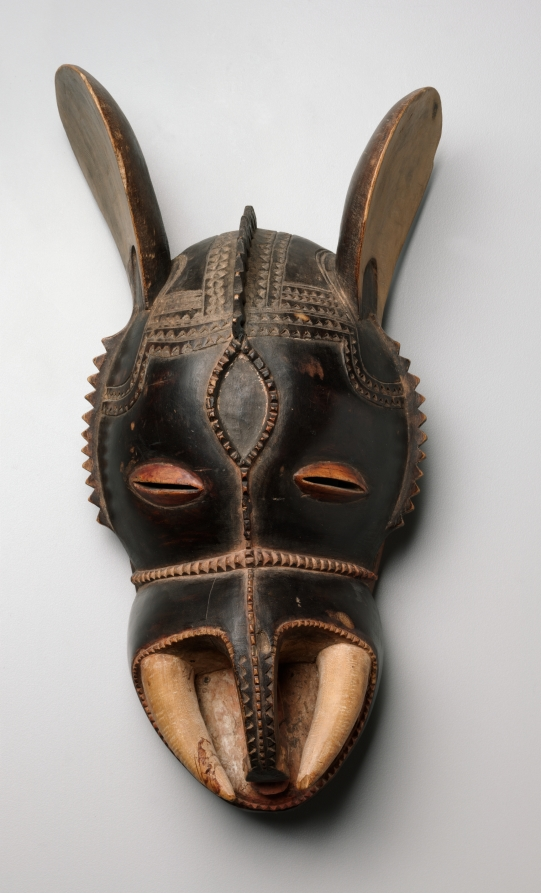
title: Face Mask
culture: Africa, West Africa, Côte d'Ivoire, possibly Yaure-style carver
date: early 1900s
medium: Wood, paint, and colorant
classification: Mask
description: Central Côte d'Ivoire is characterized by cultural assimilation and adoption. Connections can be seen in masquerades and in composite mask forms. Here, masks often blend human and animal features, and the depiction of elephant traits is a recurring theme. Yaure peoples associated elephant masks with a cult called Dye, and they appear when important sacrifices have to be made.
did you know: The carver compressed the scale of both the elephant's ears and tusks in this mask.